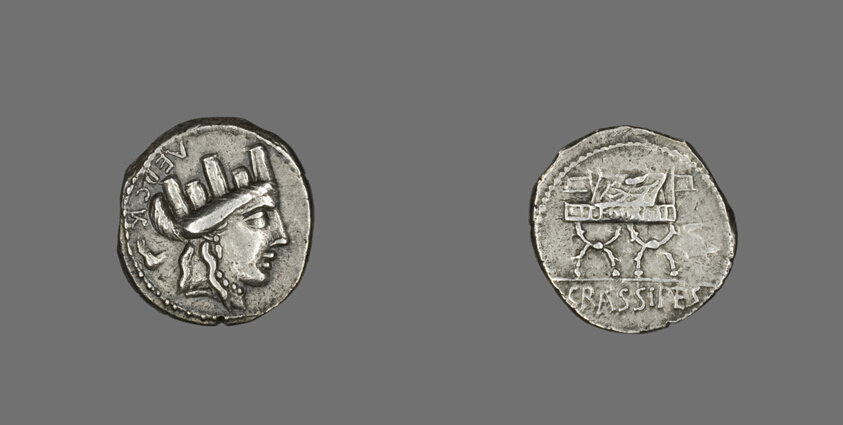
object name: Coin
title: Denarius (Coin) Depicting the Goddess Cybele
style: republic period, ancient, roman (ancient, style or period)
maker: Roman, minted in Rome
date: 84 BCE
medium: Silver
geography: Italy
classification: coin; ancient art; struck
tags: goddesses